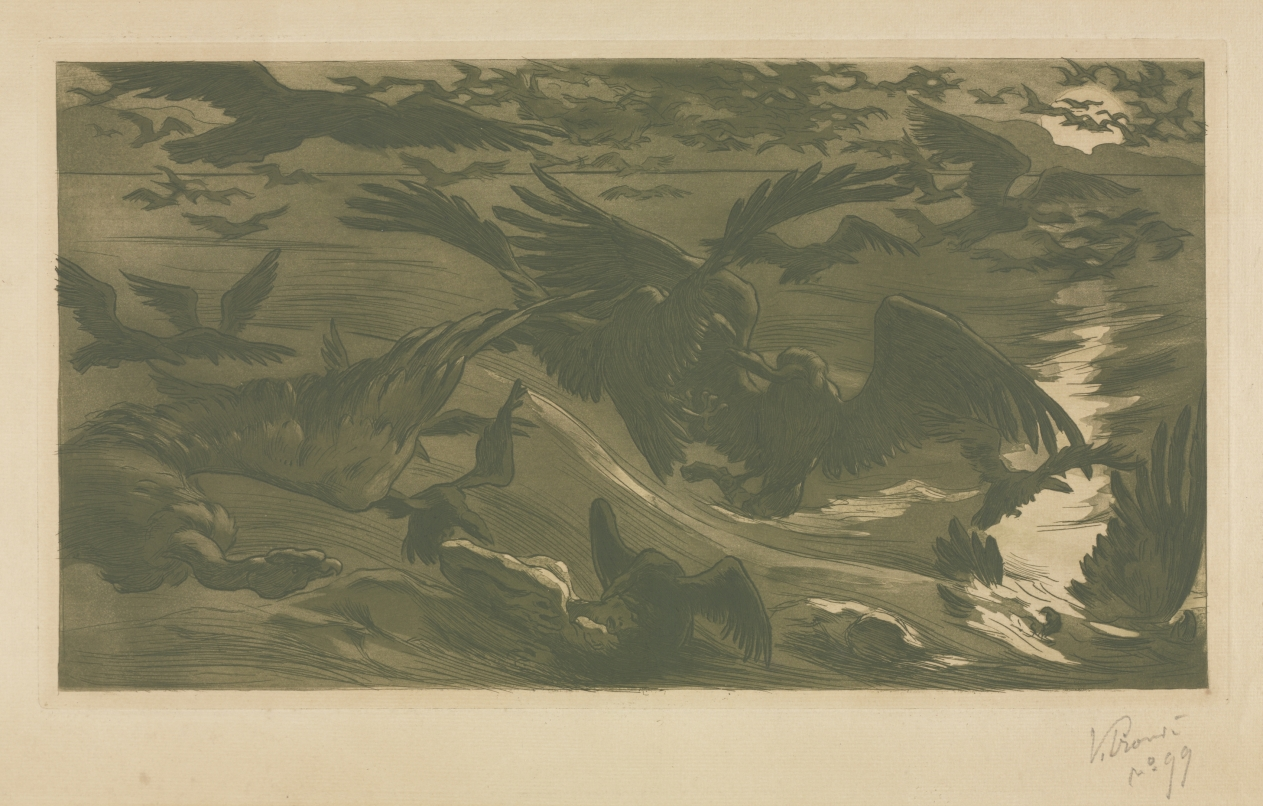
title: Birds of Prey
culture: France, 19th century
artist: Victor Emile Prouvé (French, 1858–1943)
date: 1893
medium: etching and aquatint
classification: Print